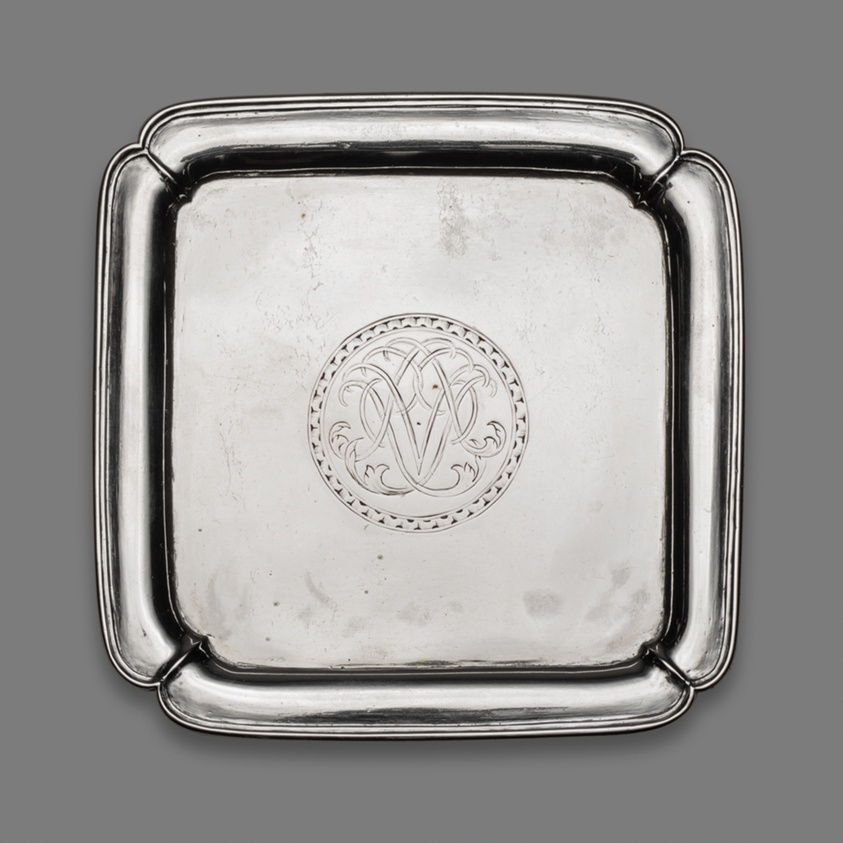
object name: Metalwork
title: Waiter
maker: Charles Le Roux; American, 1689–1745; New York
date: 1710–30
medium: Silver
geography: New York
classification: vessel for serving food; silver; american decorative arts; american arts; decorative arts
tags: dining, drinking